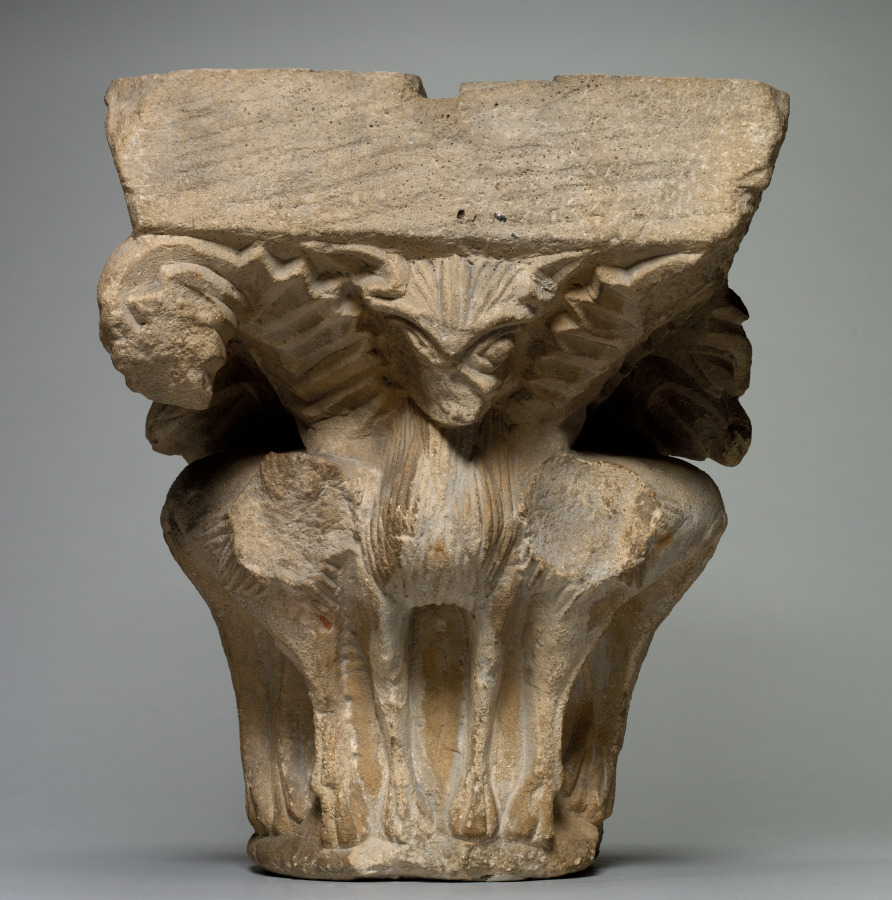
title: Capital with Addorsed Quadrupeds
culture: Southwest France, Languedoc, Toulouse (?), late 12th to early13th Centuries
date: late 1100s-early 1200s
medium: limestone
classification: Sculpture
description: Monstrous images were prevalent in the decoration of religious buildings during the Middle Ages. Such images must have impressed, perhaps even terrified, the monks and visitors who spent much of their time within the cloister or church, a place of prayer, contemplation, and reflection. Scholars have speculated how such images would have been received by the people given the ubiquity of monsters in medieval society. The carved monsters, often symbolizing vice and retribution for sin, were possibly designed to provoke a range of emotional responses including laughter, wonder, surprise, fear, and shock. This striking imagery must have had a strong impact, which in turn led Saint Bernard of Clairvaux (1090–1153), the spiritual head of the Cistercian order, to admonish their use as distracting from prayer.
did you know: A quadruped is an animal with four feet; the specific animal shown here is unidentified.